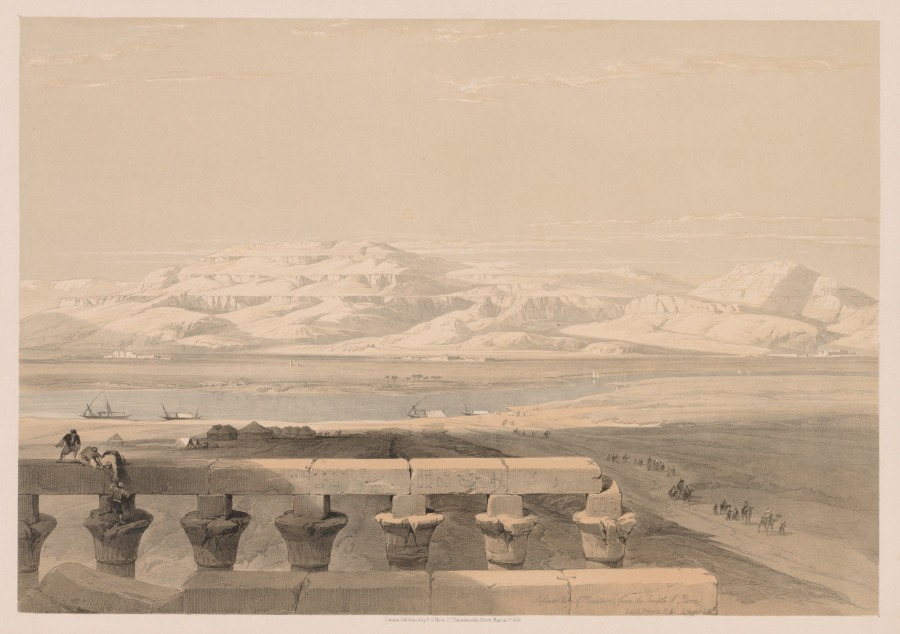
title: Egypt and Nubia: Volume I - No. 30, Lybian Chain of Mountains from the Temple of Luxor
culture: England, 19th century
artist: Louis Haghe (British, 1806–1885)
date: 1838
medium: color lithograph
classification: Print